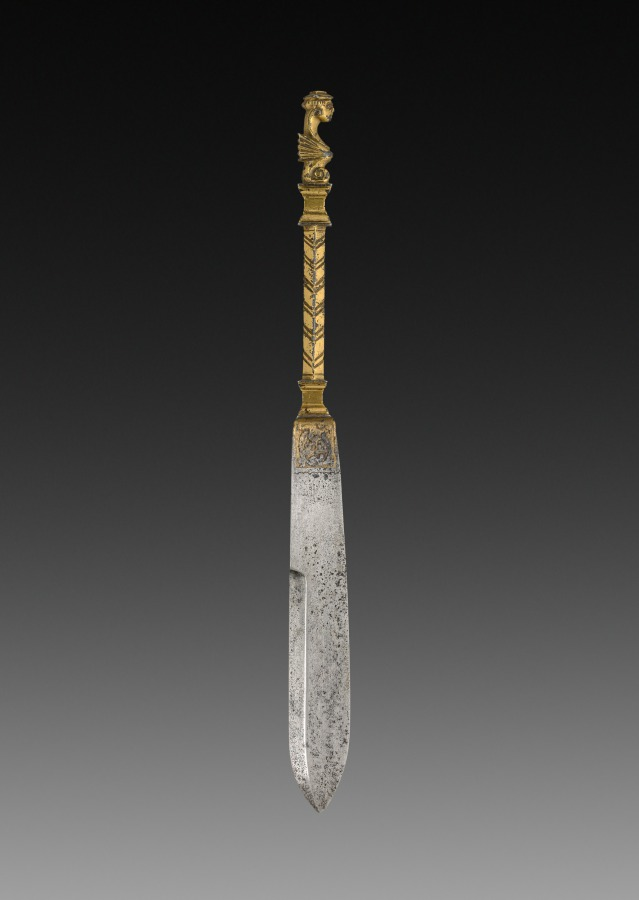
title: Table Knife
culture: Flanders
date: c. 1500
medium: gilt bronze and steel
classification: Metalwork